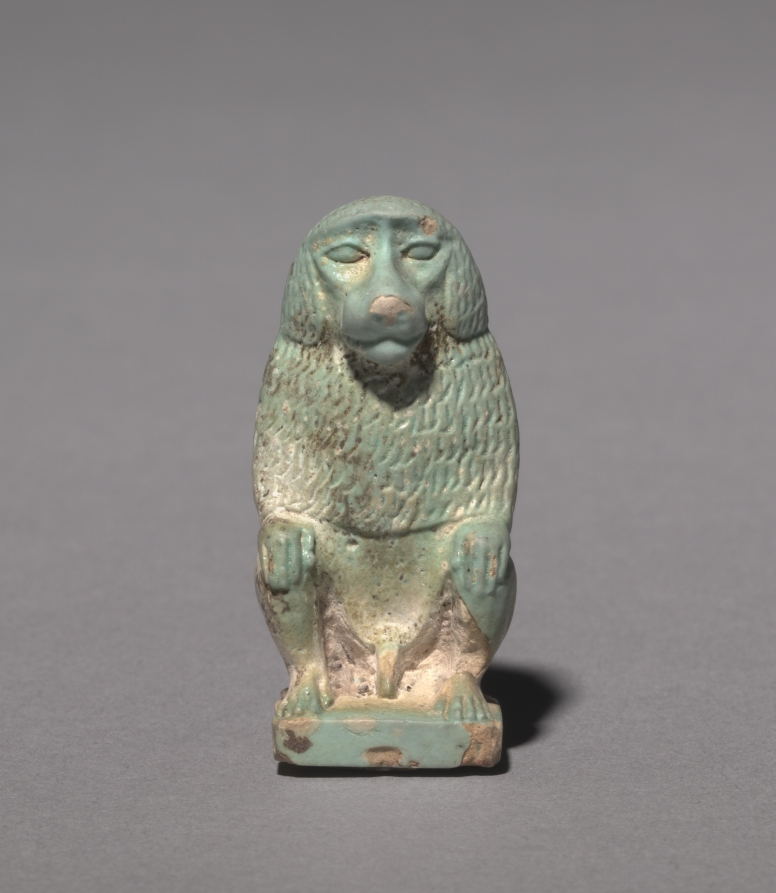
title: Thoth as Baboon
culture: Egypt, Late period (715–332 BCE), Dynasty 26–Greco-Roman period (332 BCE–395 CE), Ptolemaic dynasty (305–30 BCE)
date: 664–305 BCE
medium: pale turquoise faience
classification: Amulets